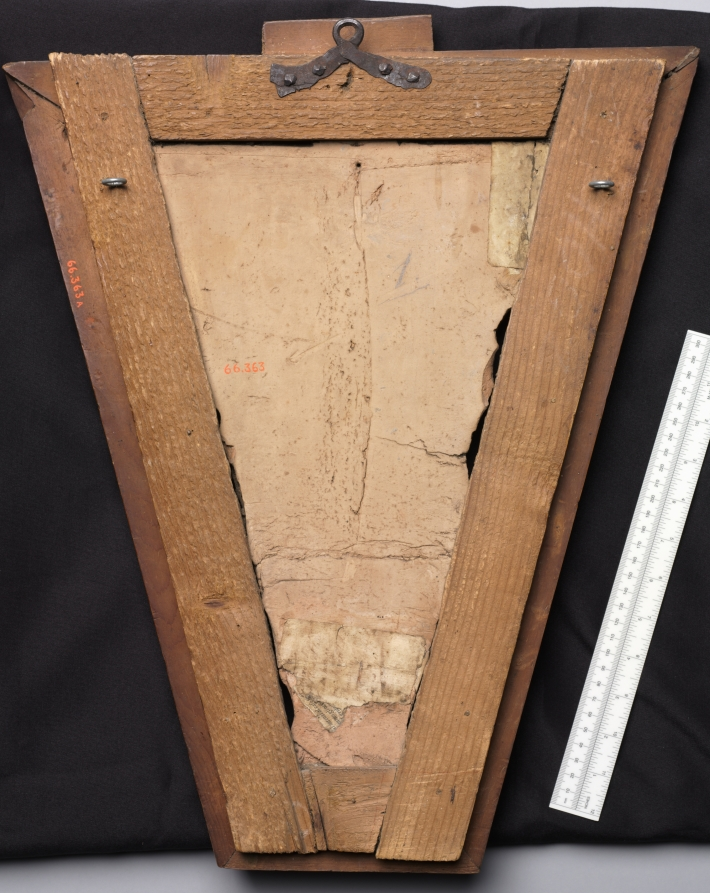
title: Crucifixion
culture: (Southern?) France, 17th century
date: c. 1680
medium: terracotta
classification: Sculpture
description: This work is quite atypical for the period due to its physiognomy and composition: Christ's figure is stout in comparison to the slender, elongated figures more common at the time. This effect is compounded by the tight focus of the composition; the artist emphasizes Christ by minimizing background and ornamentation. The design is adapted from an engraving after Charles Le Brun (1619–1690) who studied in Rome and became primary painter to Louis XIV of France. The innovative, simplistic approach of the relief contrasts to the style that Le Brun championed as head of the French Academy. Scholars dispute the legitimacy of the frame as original to the piece, due to its emphatic decoration compared to the solemn relief.